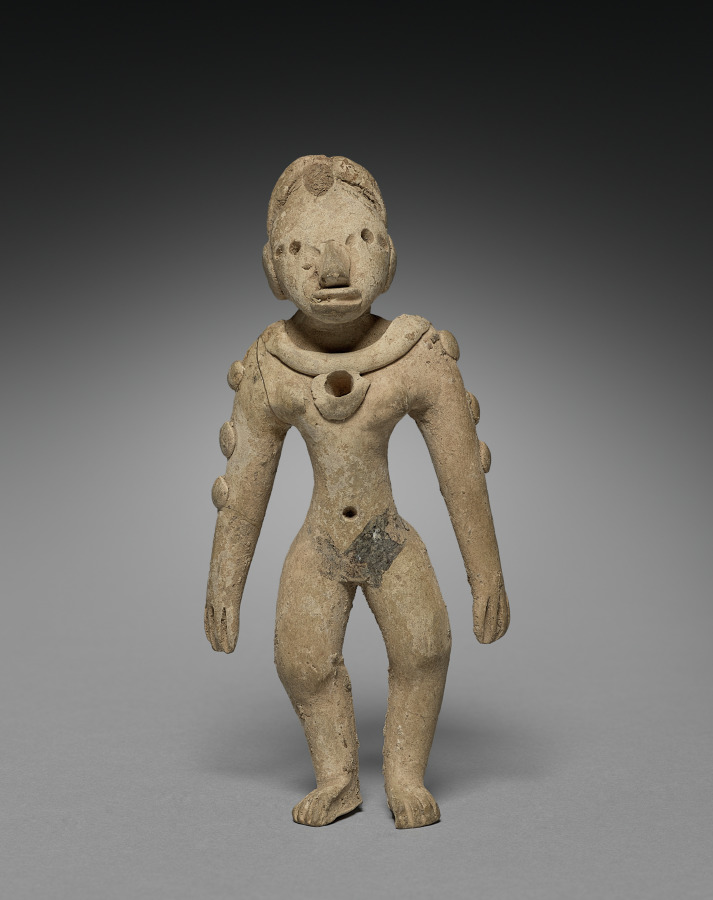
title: Female Figurine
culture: Mesoamerica, Veracruz, Huastec, Panuco Style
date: 300–600 CE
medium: ceramic, pigment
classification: Sculpture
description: Clay was a major medium in ancient Veracruz, located on Mexico’s Gulf Coast, and artists used it to create huge quantities of sculpture ranging from small whistles and figurines like this one to impressive, life-size figural effigies. Meanings are often obscure, but small objects were important enough to have been deposited in tombs and buried offerings.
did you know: Clay figurines were the earliest and most common art form in the ancient Mesoamerican culture region.